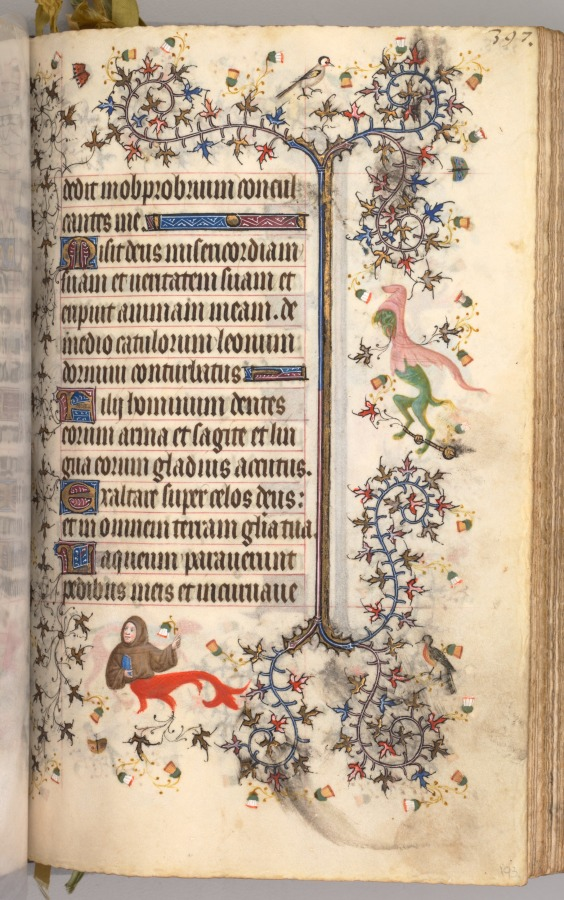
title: Hours of Charles the Noble, King of Navarre (1361-1425): fol. 193r, Text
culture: France, Paris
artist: Master of the Brussels Initials and Associates (French)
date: c. 1405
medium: ink, tempera, and gold on vellum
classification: Bound Volume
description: This precious volume was obviously highly prized by its owner, the French-born King of Navarre, who had his coat of arms painted on no less than twenty folios. Rather than directly commissioning this manuscript from a specific workshop, it seems that Charles the Noble acquired his book of hours -- perhaps ready-made for the luxury market -- while on a trip to Paris in 1404-05. A collaborative effort, six painting styles are evidenced within the pages of this codex, those of two Italians, two Frenchmen, and two Netherlanders. The painter who was responsible for the planning and decoration of the book, and who produced seventeen of the large miniatures, was a Bolognese artist known as the Master of the Brussels Initials. His principal assistant, responsible for most of the borders, was a Florentine who signed his name "Zecho" da Firenze on folio 208 verso.